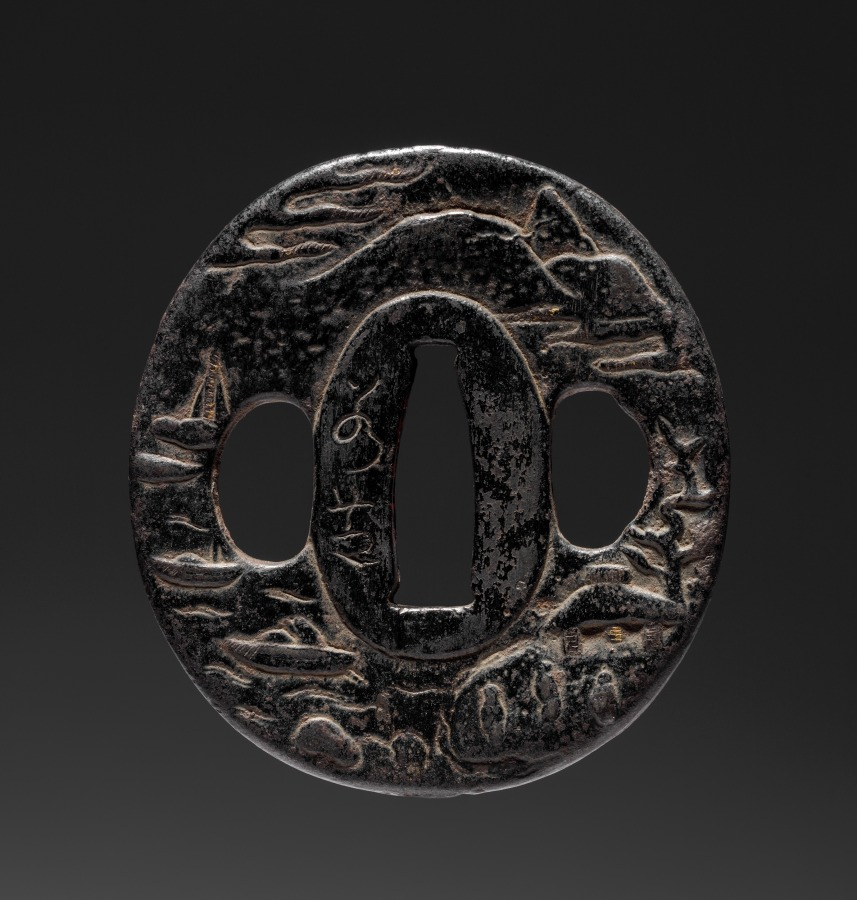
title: Sword Guard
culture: Japan, Edo period (1615–1868)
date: late 1600s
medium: iron (Jakushi type)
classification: Arms and Armor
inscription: signed "Jakushi."